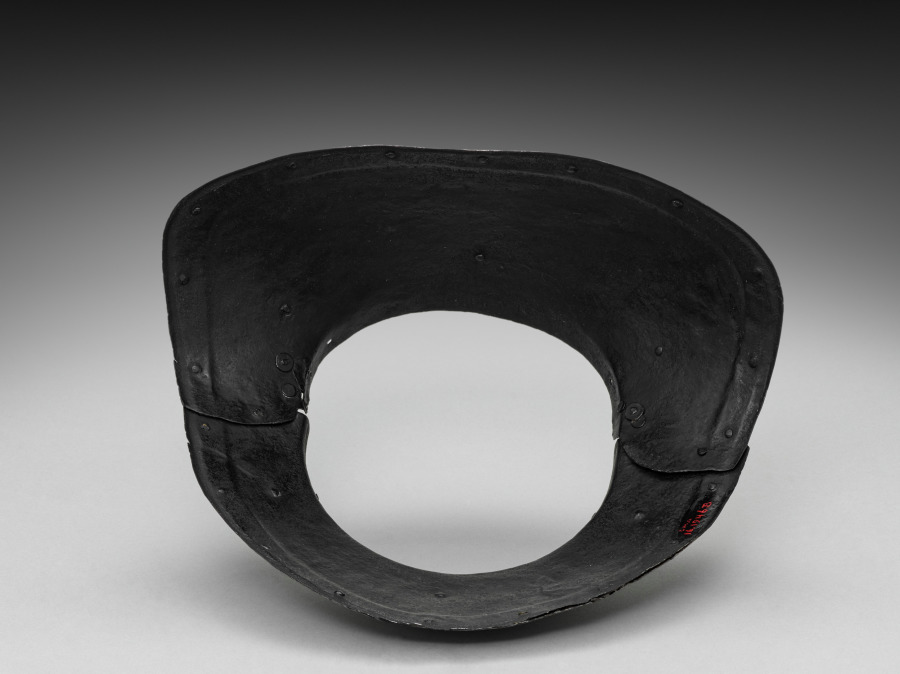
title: Colletin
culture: Germany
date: c.1550–1570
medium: iron, steel, leather and brass rivets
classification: Arms and Armor